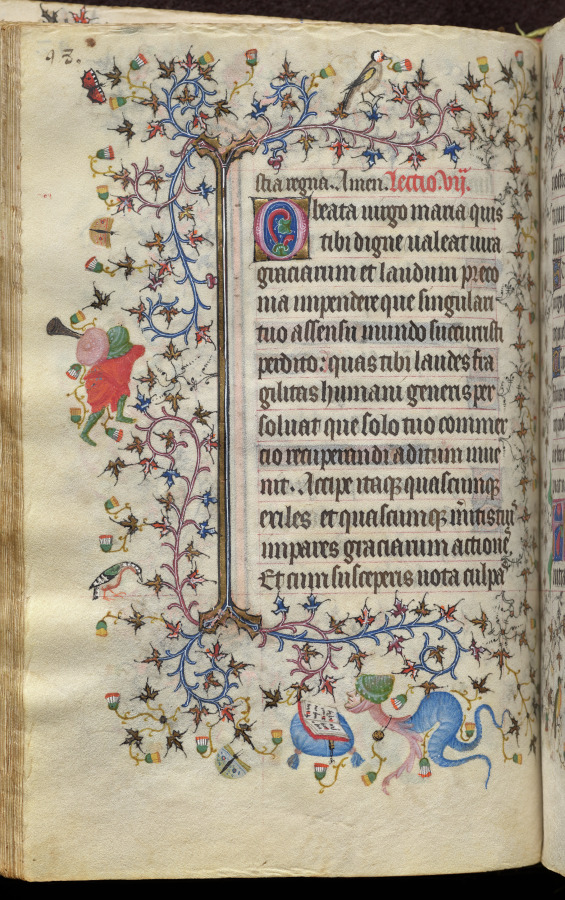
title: Hours of Charles the Noble, King of Navarre (1361-1425): fol. 49v, Text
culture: France, Paris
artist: Master of the Brussels Initials and Associates (French)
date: c. 1405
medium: ink, tempera, and gold on vellum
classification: Bound Volume